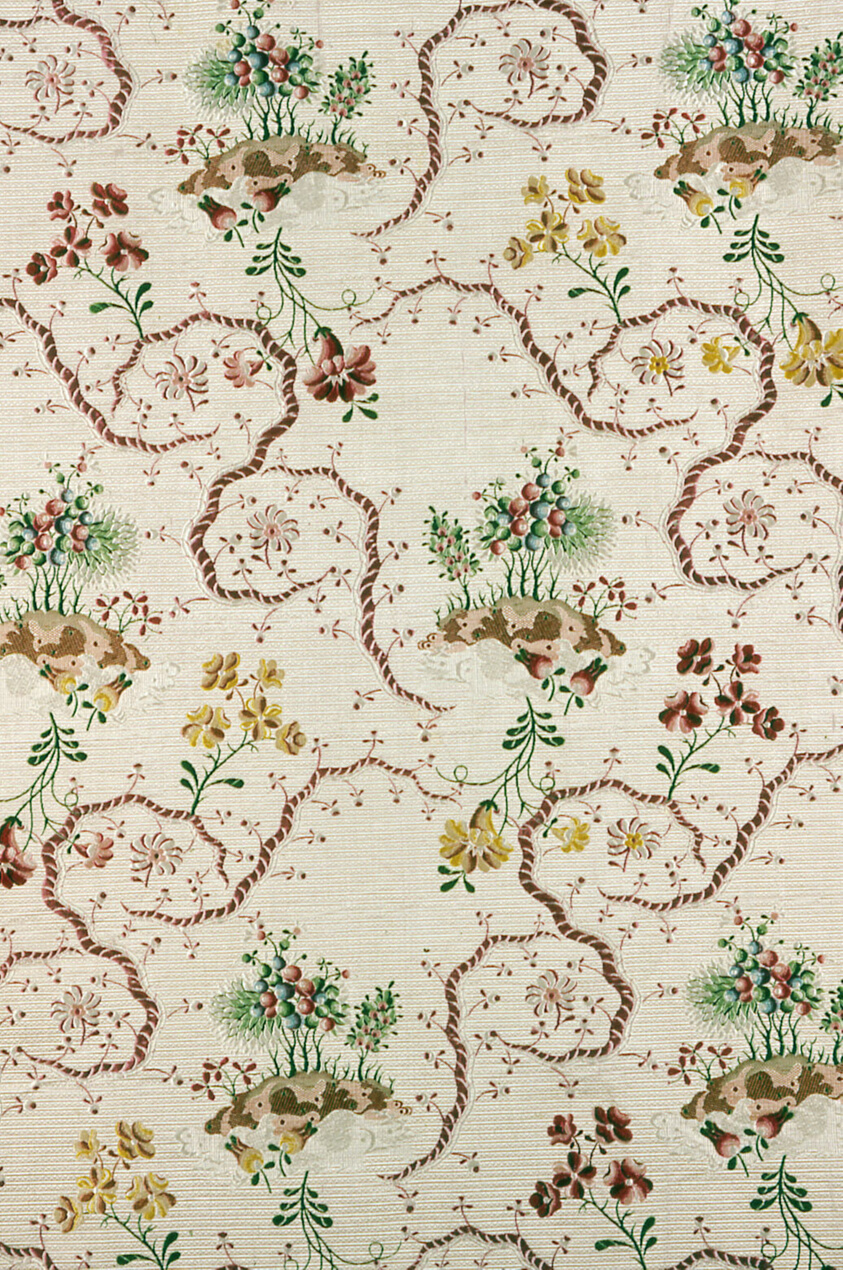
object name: Textile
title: Panel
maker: Possibly England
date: c. 1835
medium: Silk, plain weave with supplementary patterning warps, supplementary brocading wefts, and self-patterned by two-color complementary ground weft floats; woven on loom with Jacquard attachment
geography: England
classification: textile; weaving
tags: lattices, garlands, flowers